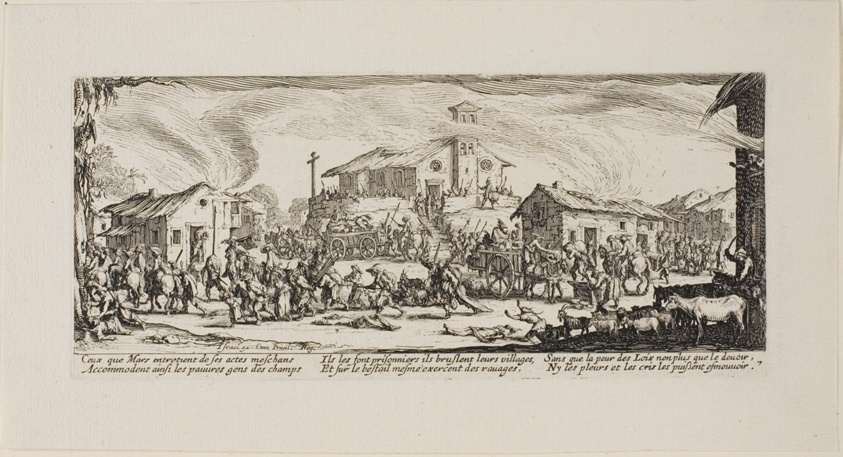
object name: Print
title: Plundering and Burning a Village, plate seven from The Miseries of War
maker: Jacques Callot (French, 1592-1635); published by Israël Henriet (French, 1590-1661)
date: 1633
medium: Etching on paper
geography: France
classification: etching; print; prints and drawing